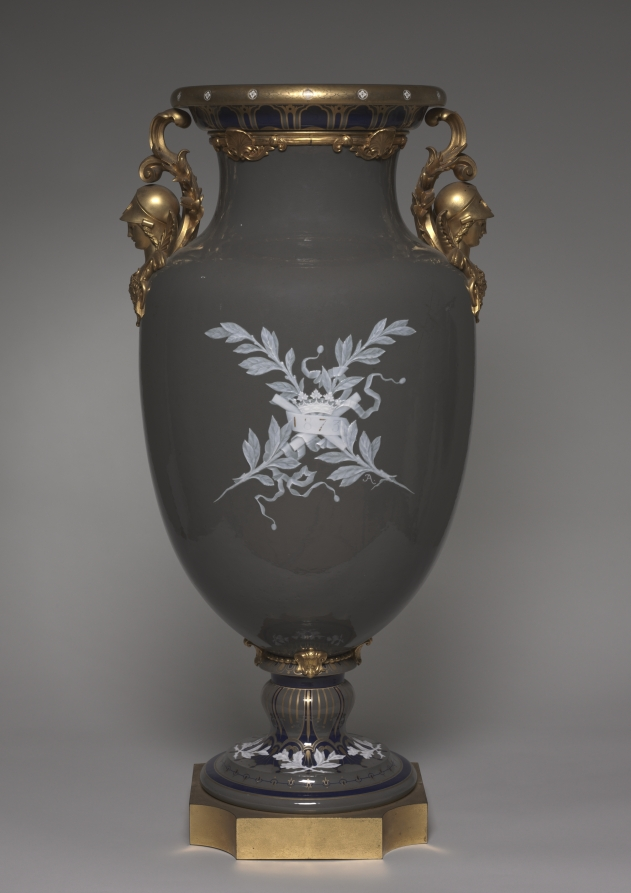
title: Vase with Portrait of President MacMahon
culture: France, 19th century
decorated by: Alfred-Thompson Gobert (French, 1822–1894)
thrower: Constantin Renard (French)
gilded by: Emile-Bernard Rejoux (French, 1832-)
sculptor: Jean-Denis Larue (French, 1884)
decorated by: Jules Archelais (French, 1865–1902)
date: c. 1872–1874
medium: porcelain with gilt bronze mounts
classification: Ceramic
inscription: incised gilded letters located directly below portrait relief: "MACMAHON"; incised gilded letters located in complex design of ribbons above portrait: "AMOR PATRIA," and below: "SAPIENTIA," "FORTITUDO"; on primary face, beneath the ornamental surround of MacMahon's portrait: "Gob. R/Sèvres"; on reverse, incised gilt numerals located within ornamental ribbon: "1873"; incised in the porcelain inside neck: "CR 72 6" and beneath it "CR 72 9"; incised letters beneath the vase: "NL"; a small gilt-metal bucket is installed within the neck of the MacMahon Vase, on its bottom are scratched the letters: "ABF"; printed in green inside the neck and beneath the vase: "s 74"; printed in red on the lip: a circular stamp with the words "Decore a Sèvres 74" surrounding the initials "RF" [Repbulique Français].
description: Marie Edmé Patrice Maurice de MacMahon (1808-1893), whose portrait appears on this vase, was its first owner. He was a successful military leader who was given the titles of Duke of Magenta and Marshall of France by Napoleon III, but after France's defeat in the Franco-Prussian War of 1870-71 and the end of the Second Empire, MacMahon was elected second President of the Third Republic of France.